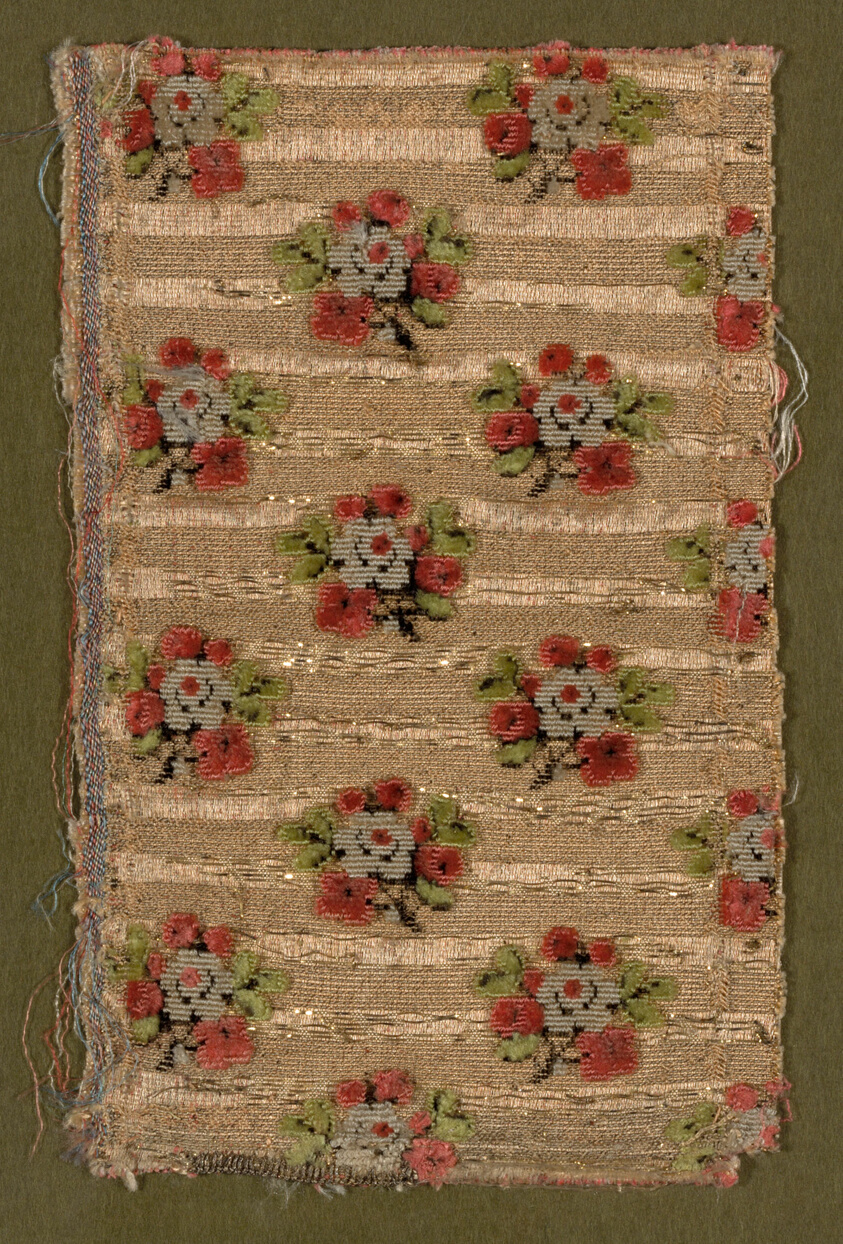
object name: Textile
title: Fragment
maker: France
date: 1750/75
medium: Silk, cut, uncut, and voided velvet with additional patterning wefts of gold foil (cut strips wound around silk core) against satin weave foundation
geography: France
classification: textile; weaving - velvet